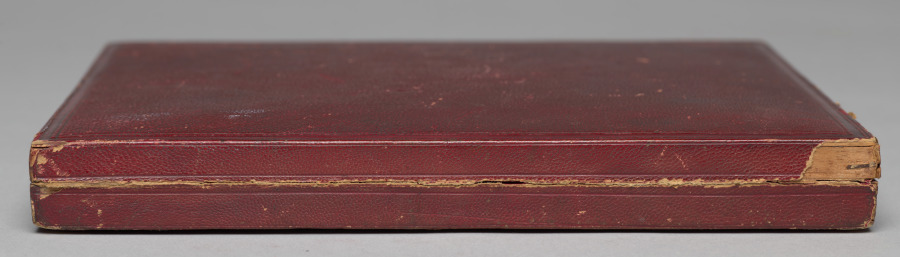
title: English family of seven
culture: England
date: c. 1840s-1850s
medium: daguerreotype, half-plate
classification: Photograph